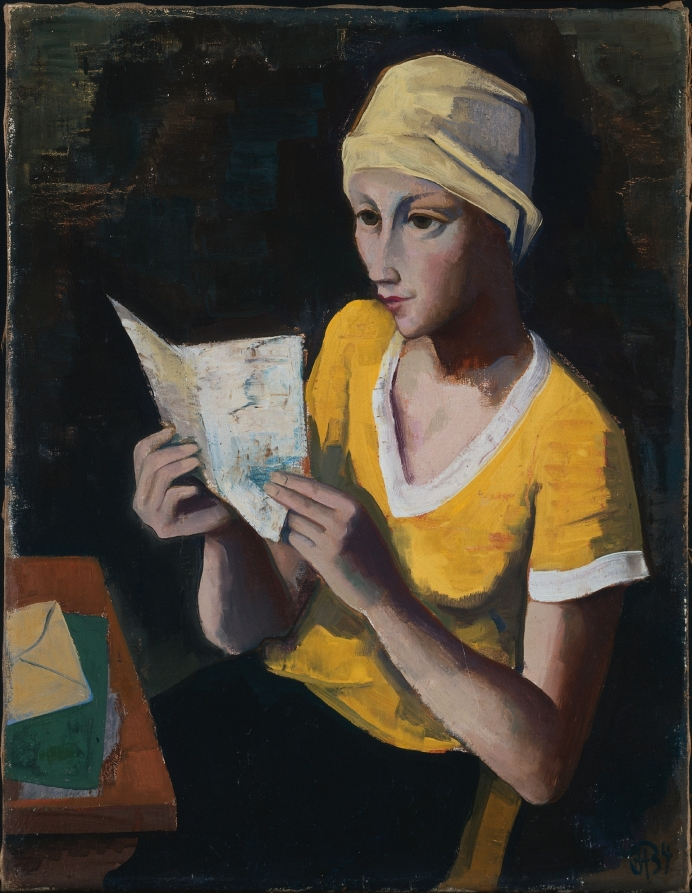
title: The Letter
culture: Germany, 20th century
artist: Karl Hofer (German, 1878–1955)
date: 1934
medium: oil on canvas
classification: Painting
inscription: signed lower right: CH34 [monogram]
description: Hofer's art is filled with disillusionment and pessimism, expressing his dark vision of modern life through a limited range of themes that the artist repeated obsessively. Born in Karlsruhe, Hofer settled in Berlin in 1913. Condemned by the Nazis as a "degenerate artist," in 1933 he was dismissed from his teaching post. In 1943 Hofer's studio and most of his work were destroyed by bombing.